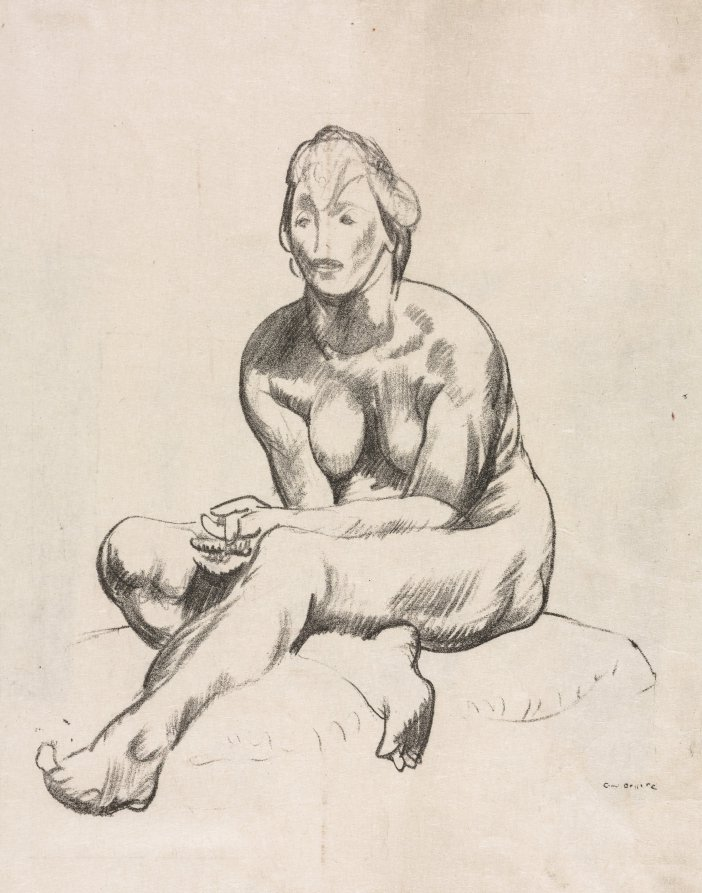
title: Life Study, Nude Woman Seated With Folded Hands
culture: America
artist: George Bellows (American, 1882–1925)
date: 1917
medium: lithograph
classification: Print